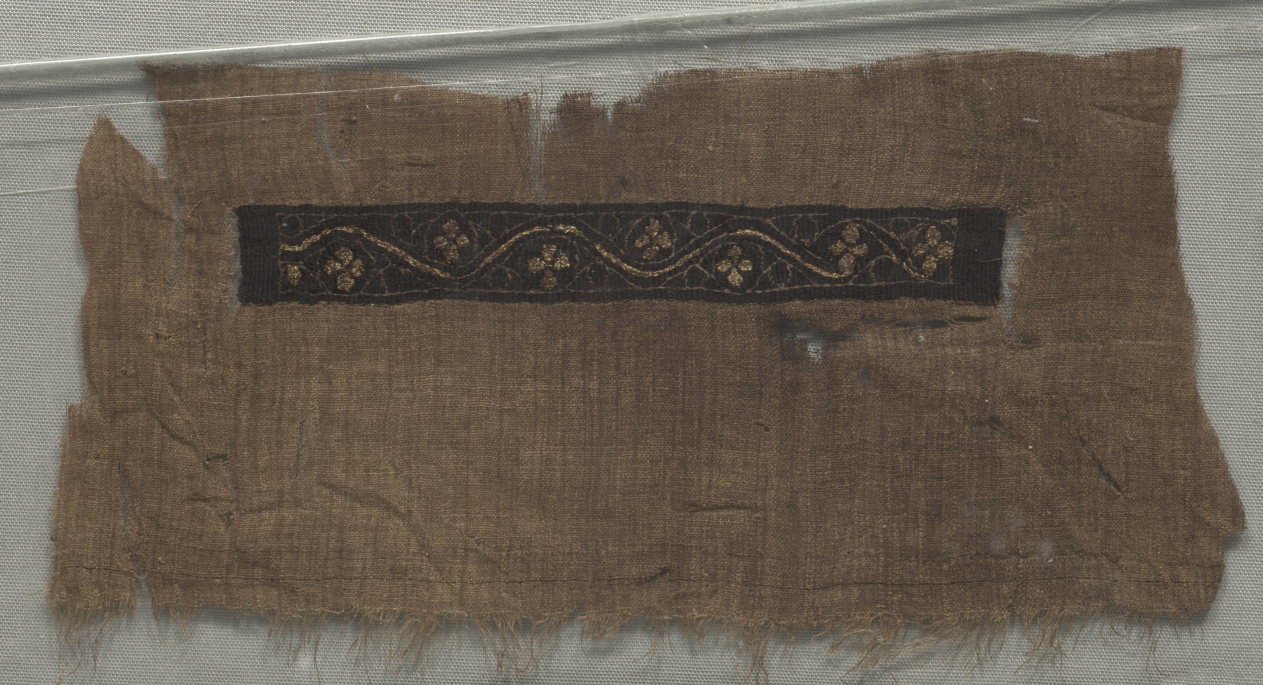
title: Fragment, Probably a Scarf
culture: Egypt, Byzantine period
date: 300s–400s CE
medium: tabby ground with inwoven tapestry ornament; linen, wool, and gold foil around gummed silk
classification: Textile